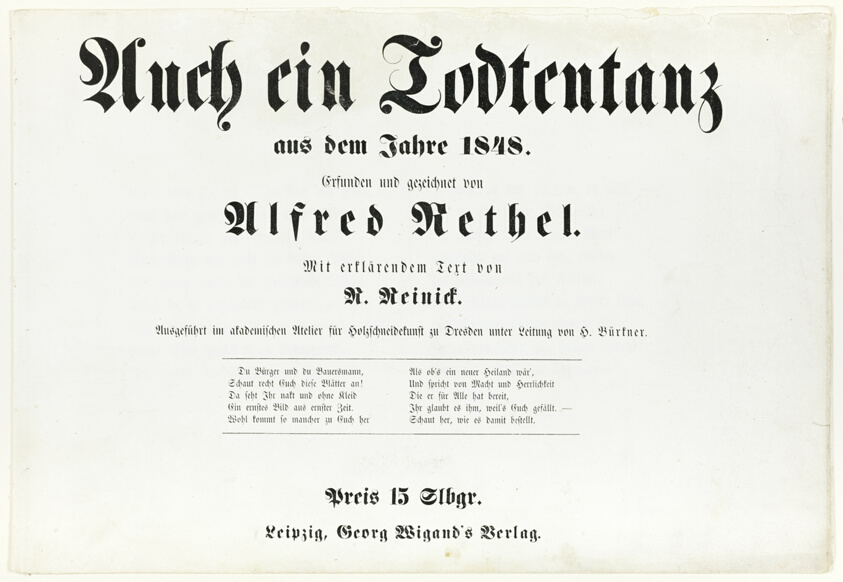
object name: Print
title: Auch ein Todtentanz, title page and text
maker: Alfred Rethel (German, 1816-1859)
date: 1848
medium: Letterpress in black on ivory wove paper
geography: Germany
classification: woodcut; print; prints and drawing